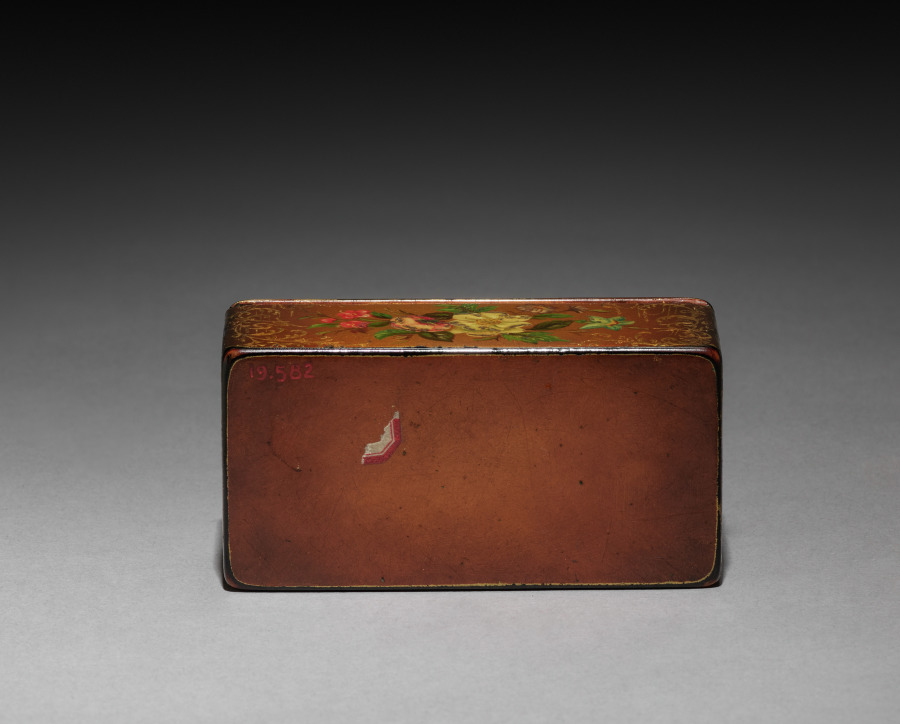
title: Box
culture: Russia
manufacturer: Lukutin Factory (Russian, 1818–1904)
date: 1830–81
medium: lacquered wood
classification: Miscellaneous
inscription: inscription on interior.